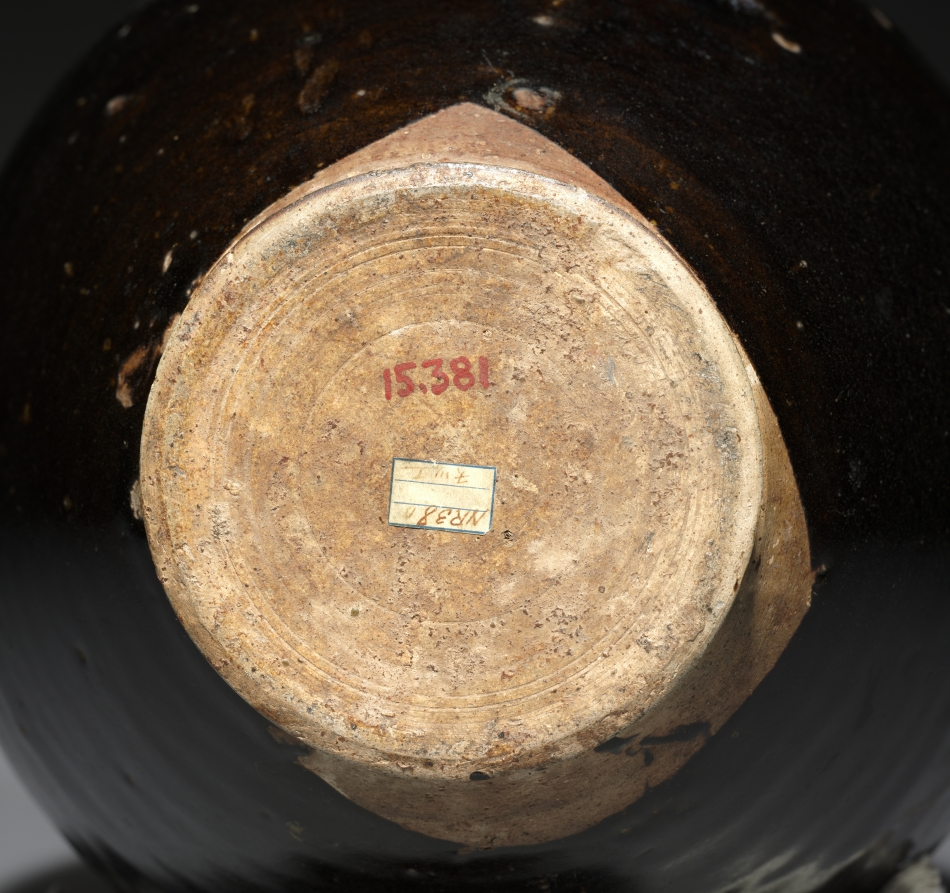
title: Jar: Black Ware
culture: China, Henan province, Huangdao kilns, Tang dynasty (618-907)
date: 700s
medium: glazed stoneware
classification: Ceramic